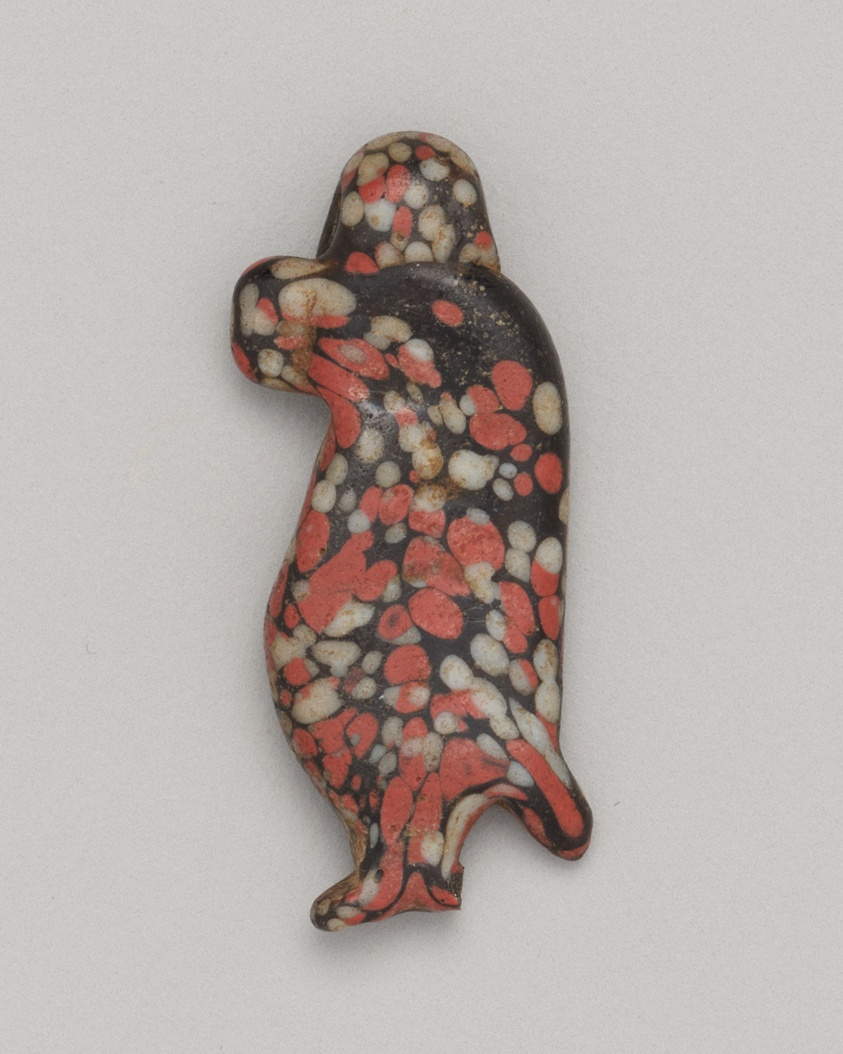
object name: Costume and Accessories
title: Amulet of Taweret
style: new kingdom, egyptian, ancient, eighteenth dynasty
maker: Egyptian; Probably Tell el-Amarna, Egypt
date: New Kingdom, Dynasty 18, reign of Akhenaten (about 1352–1336 BCE)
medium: Glass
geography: Egypt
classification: amulet; glass; jewelry; ancient art; costume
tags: goddesses